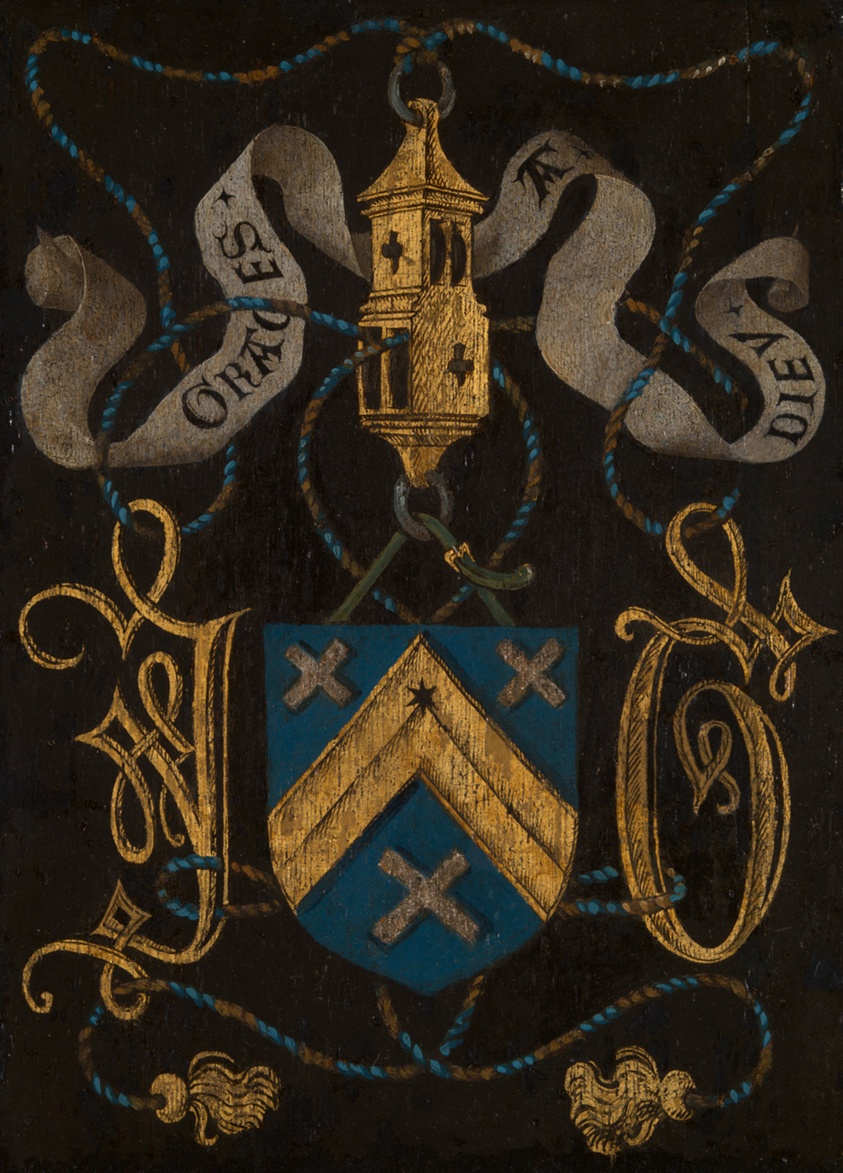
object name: Painting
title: Portrait of Jean Gros (recto); Coat of Arms of Jean Gros (verso)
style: Renaissance, 15th century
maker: Rogier van der Weyden (Netherlandish, c. 1399–1464); Workshop of Rogier van der Weyden (Netherlandish, c. 1399–1464)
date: 1460–64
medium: Oil on panel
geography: Flanders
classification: oil on panel; paint; oil paintings (visual works); painting; european painting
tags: portraits: male subject, portrait, prayer, jewelry, man, coat of arms, tower, shields, tassels, blue, blue (color), gold (color), portraits, Century of Progress, world's fairs, Chicago World's Fairs